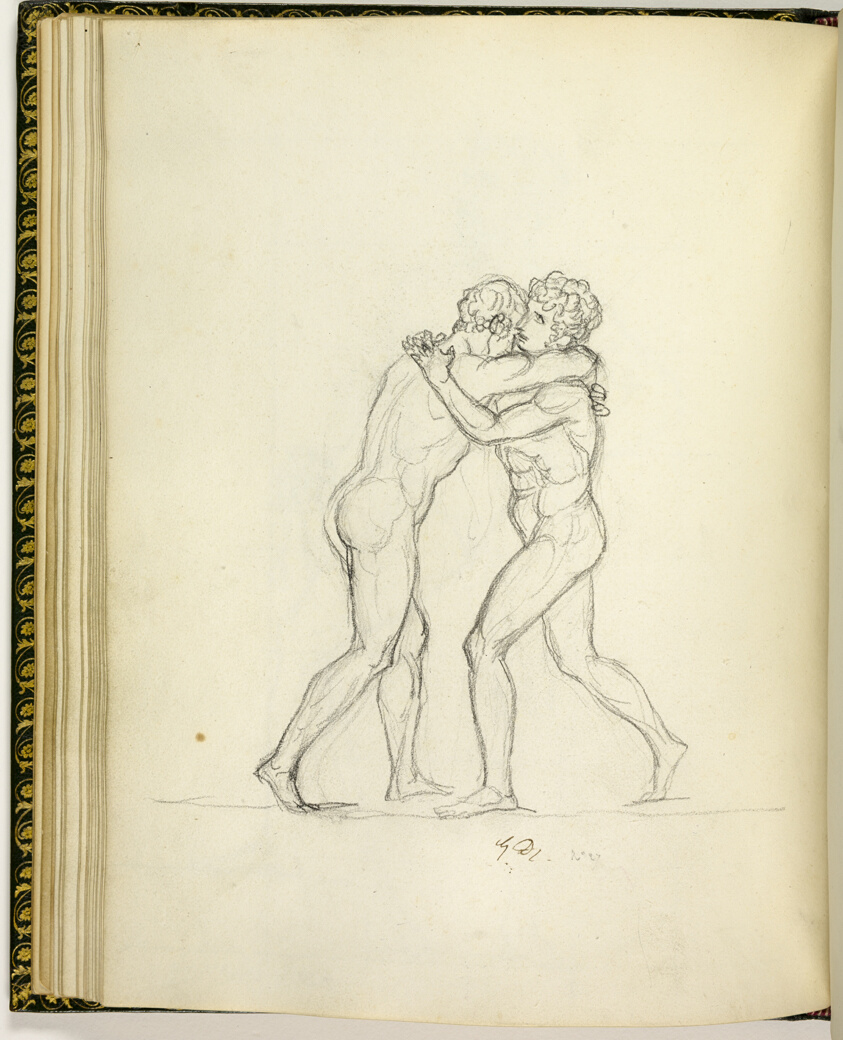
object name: Drawing and Watercolor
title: Sketchbook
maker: Jacques-Louis David; French, 1748-1825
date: 1809–10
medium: Graphite, black chalk, black crayon, and pen and brown ink drawings on wove paper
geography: France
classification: sketchbook; chalk; prints and drawing; paper